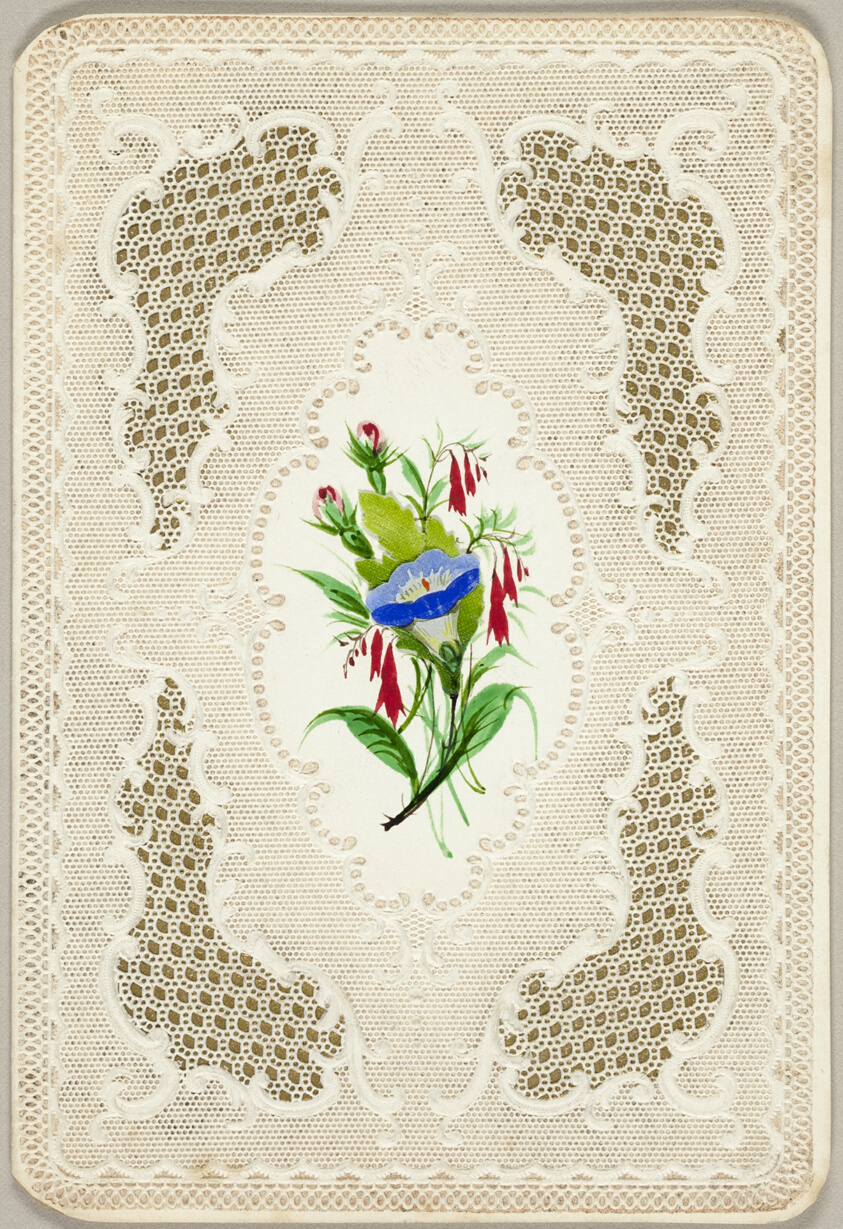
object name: Drawing and Watercolor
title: Untitled Valentine (Flowers)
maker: Unknown Artist; English, 19th century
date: 1840/50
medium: Collaged elements and watercolor on pink accented and embossed ivory wove paper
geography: England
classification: valentine; prints and drawing; paper